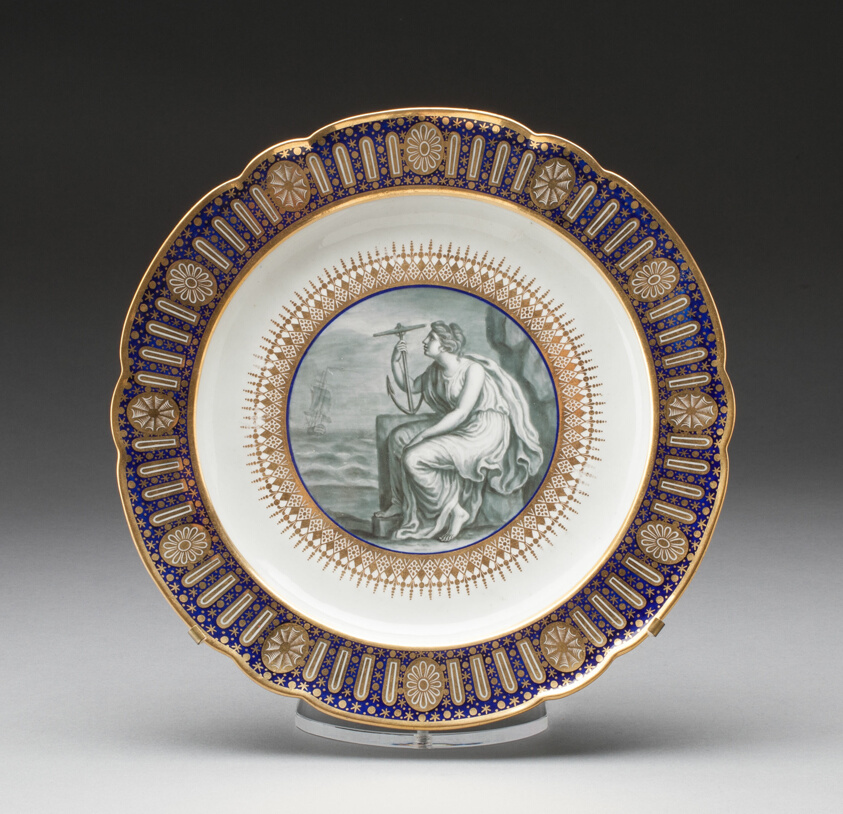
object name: Ceramics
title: Plate from the Duke of Clarence Service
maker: Worcester Porcelain Factory (Flight Period, 1783-1792); Worcester, England, founded 1751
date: c. 1792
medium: Soft-paste porcelain with blue enamel, monochrome gray, and gilding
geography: Worcester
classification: plate (general, dish); tableware; dish (vessel); porcelain; european decorative arts; ceramics